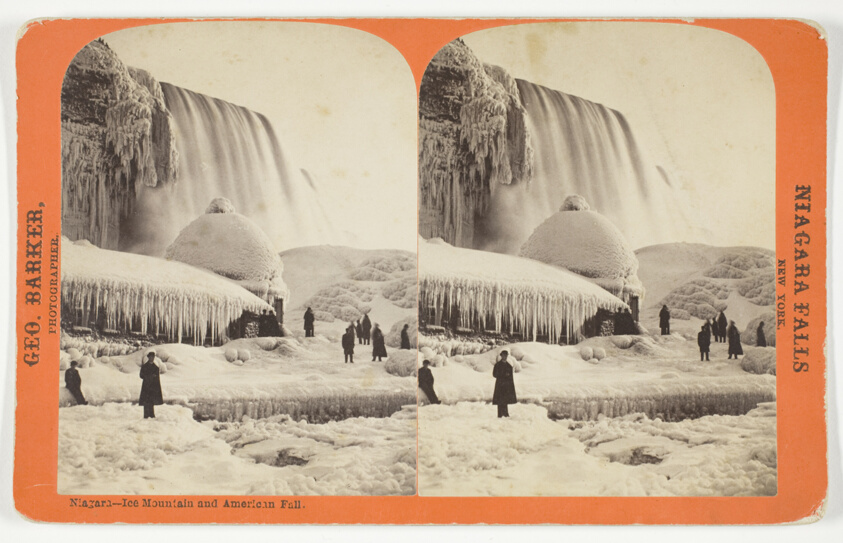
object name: Photograph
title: Niagara - Ice Mountain and American Fall, from the series "Niagara Falls, New York"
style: 19th century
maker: George Barker; American, born Canada, 1844–1894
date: Late 19th century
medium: Albumen print, stereo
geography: Niagara Falls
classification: photography; photograph; albumen silver print; stereograph (albumen)